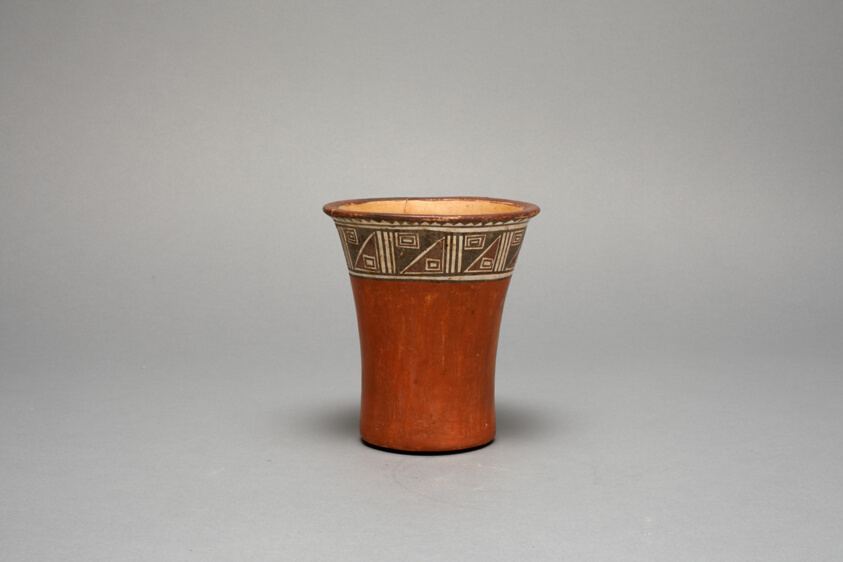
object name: Vessel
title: Drinking Vessel (Kero)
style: inca, late intermediate period, Pre-Columbian, americas, Arts of the Americas, andean, andes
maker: Inca (South coast or southern highlands, Peru)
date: 1100–1200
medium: Ceramic and pigment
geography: Peru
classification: earthenware; ceramics; vessel; art of the americas